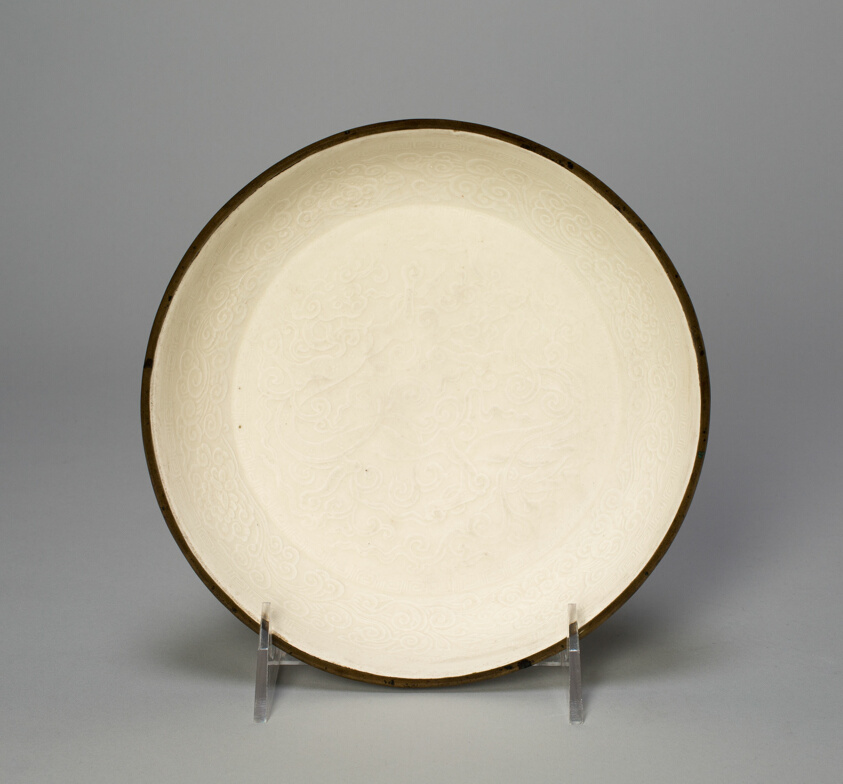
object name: Vessel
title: Dish with Dragons, Peonies, and Stylized Clouds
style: Chinese (culture or style), ding, East Asian, asian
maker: China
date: Song dynasty (960–1279)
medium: Ding ware; porcelain with underglaze molded decoration; copper rim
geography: China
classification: dish (vessel); porcelain; asian art; ceramics; vessel